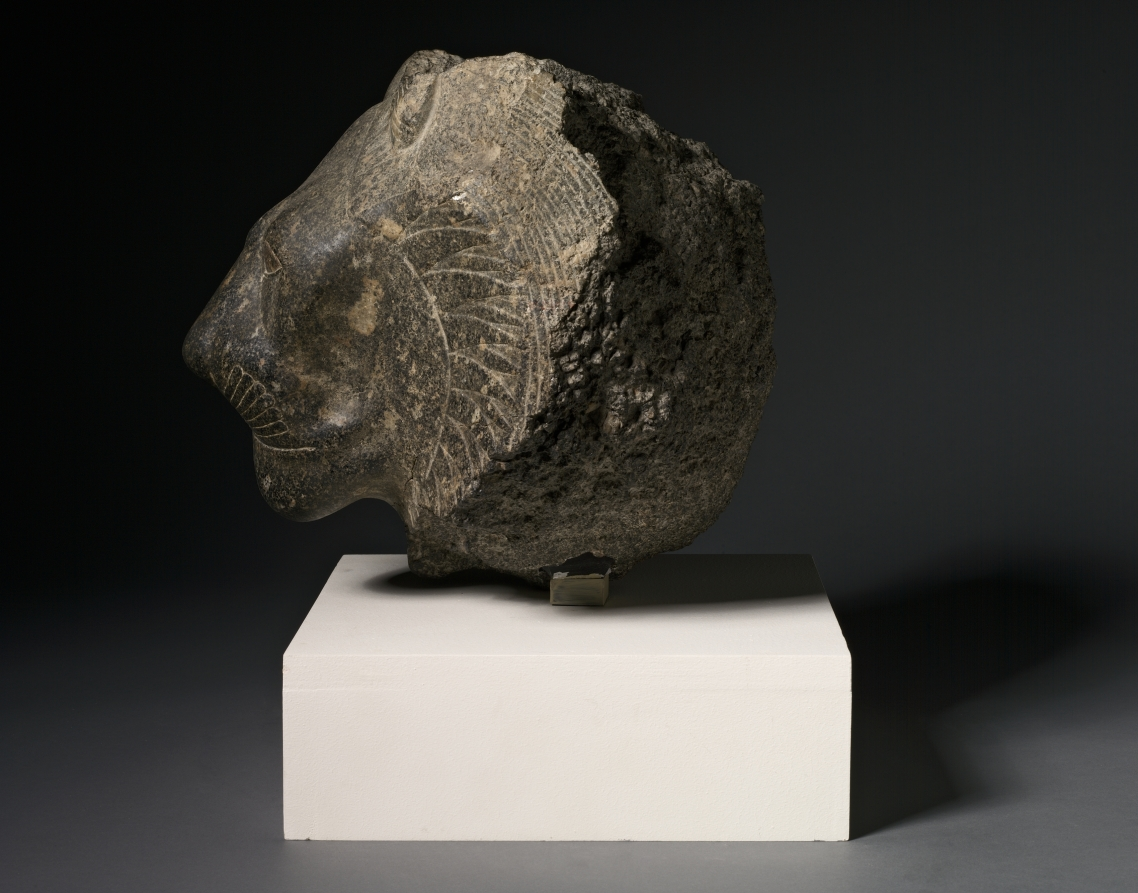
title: Head of Sekhmet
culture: Egypt, Thebes(?), New Kingdom (1540–1069 BCE), Dynasty 18, reign of Amenhotep III (1390–1352 BCE)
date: c. 1391–1353 BCE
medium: granodiorite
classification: Sculpture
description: This lioness head once belonged to a grand statue of the goddess Sekhmet, "the powerful one," probably seated and wearing a tight dress. Possibly appealing to her healing aspect, Pharaoh Amenhotep III, often described as “beloved of Sekhmet,” commissioned and dedicated hundreds of large granodiorite Sekhmet sculptures in his Theban mortuary temple. Thus, this head likely comes from Thebes, perhaps later moved across the Nile—like many such sculptures—to the temple of Mut, a related deity, at Karnak. Behind her stylized ruff, Sekhmet wears a wig, once crowned with a sun disk and uraeus, the stylized cobra symbolizing royal or divine power.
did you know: Amenhotep III may have dedicated 730 statues of Sekhmet, two for each day of the year.